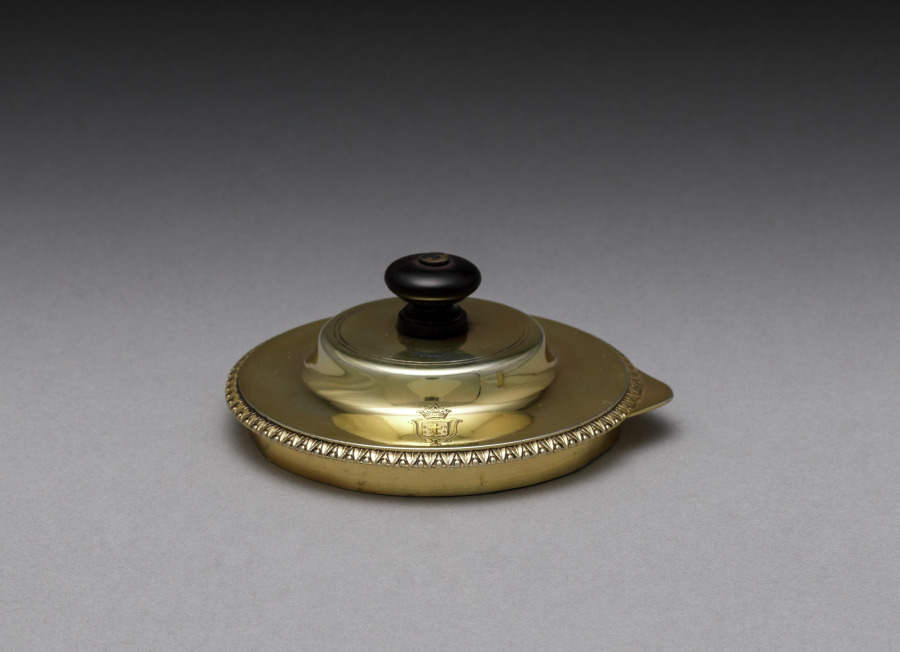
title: Cover for a Chocolate Pot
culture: France, 19th century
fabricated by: Sixte-Simon Rion (French)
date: c. 1830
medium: silver, wooden handle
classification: Silver